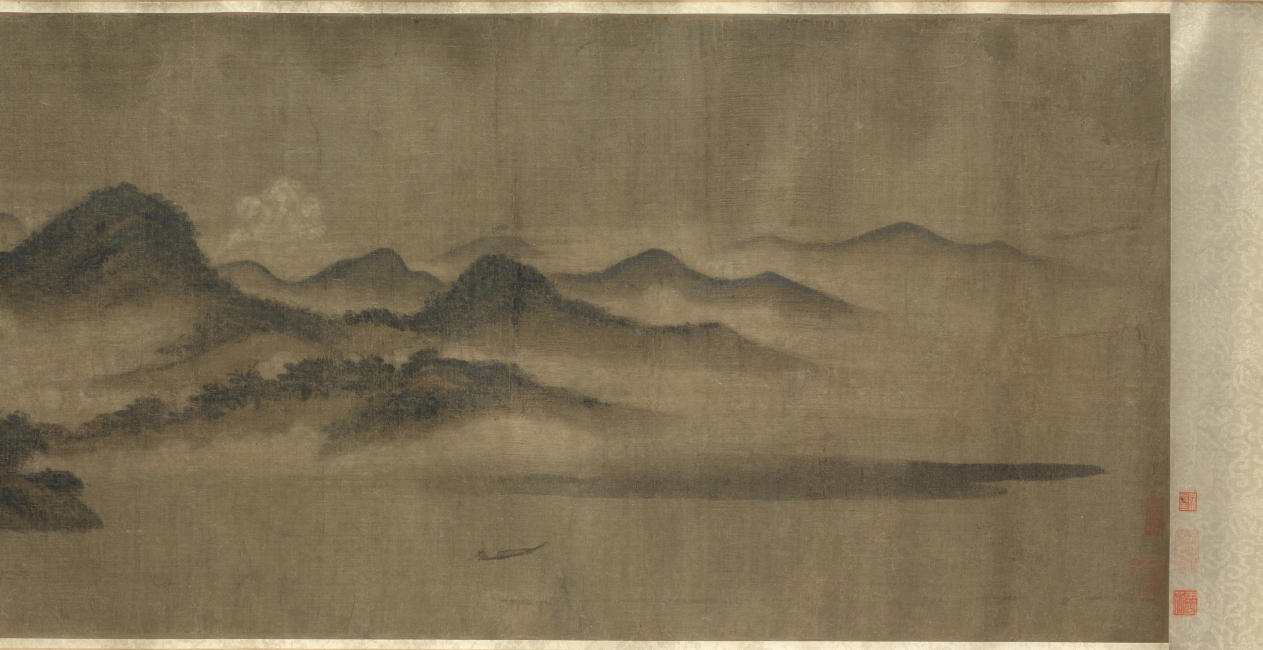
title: Cloudy Mountains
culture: China, Southern Song dynasty (1127-1279)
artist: Mi Youren (Chinese, 1072–1151)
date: 1130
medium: Handscroll; ink and color on silk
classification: Painting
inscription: 好山無數接天涯，烟靄陰晴日夕佳。/ 要識先生會到此，故留筆戲在君家。/ 庚戍歲，辟地新昌作。元暉。/ [seal] 元暉戲作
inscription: [Seal] 安陽孫氏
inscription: [Seal] 畢瀧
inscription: [Seal] 成親王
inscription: [Seal] 永瑆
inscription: [Seal] 錫三 appears twice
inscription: [Seal] 養性齋珍藏書畫印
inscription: [Seal] 芷陔審定真跡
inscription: [Seal] 玉簡齋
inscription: 2 colophons (1 dated 1650), inscription dated 1647, and 2 seals of Wang To (1592–1652)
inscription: 1 colophon, dated second month of the gengyin year 庚寅 (1650), and 2 seals of Chen Kuang 陳爌 (1646 jinshi degree)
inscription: 7 seals unidentified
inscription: A separate scroll containing six colophons on Cloudy Mountains exists; the inscribers are Luo Zhenyu 羅振玉 (1866–1940), Naito Torajiro 內藤虎次郎 (1866–1934), Nagao Ko 長尾甲 (1864–1942), and Wu Changshuo 吳昌碩 (1844–1927). Naito Torajiro alone wrote three colophons.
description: Cloudy Mountains captures the view of a lush and misty riverscape, an impression of Mi Youren’s new environment, painted in a moment of peace. With the fall of the Northern Song dynasty in 1127 upon the Jurchen’s military invasion, Mi Youren fled south across the Yangzi River. In 1130, he had reached Xinchang in Zhejiang province and thanked his host with this painting for having given him shelter. Mi Youren was the oldest son of the art critic Mi Fu (1051– 1107); both developed a distinct style of mountain scenery by accumulating wet ink dots that create a hazy atmosphere.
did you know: This scroll is one of the museum’s earliest dated Chinese paintings.